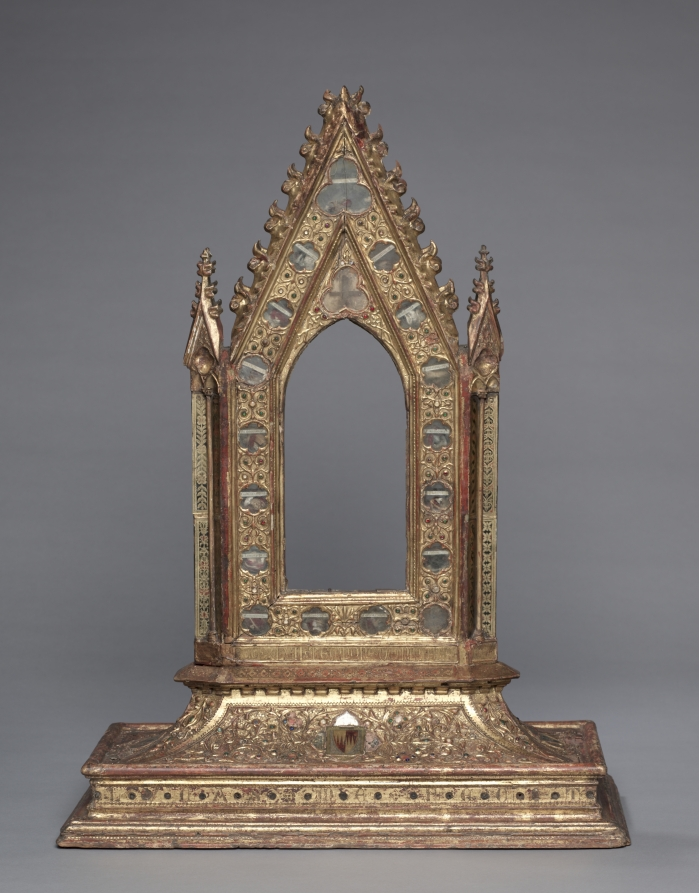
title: Frame for a Portable Reliquary Icon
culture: Italy, Siena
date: 1347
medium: gilded wood, modeled gesso, verre églomisé, glass cabochons, and relics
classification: Glass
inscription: an inscription with a stipled background runs around the lowest edge of the upright part of the frame: obverse: HOC/OPUS : FACTUM . FUIT . SUB . ANNO . DO/MINI; reverse: [small loss] /CCC . XLVII . TEMPORE . DOMINI . MINI/CINI. [This/work : has . been . made . under . year . of . the . Lord [small loss] /300 47 . in . the . time . of the Lord . Mini/Cini.] Another inscription appears on the obverse and reverse of the base: LUCAS ME FECIT. [Luke has made me.]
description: In the Middle Ages relics were thought to possess extraordinary power and were enshrined in lavish vessels called reliquaries. This complex frame once contained a painted image on each side, believed to be the Madonna and the Crucifixion, both long since lost. These images were surrounded by 17 carefully labeled relics, still visible. Intentionally portable, such votive objects could be easily carried from room to room or building to building as needed. A Latin inscription around the base reads: This work has been made under the year of the Lord CCCXLVII [1347] in the time of the Lord Mini/Cini. The inscription likely refers to Mino Cinughi, rector of the Hospital of Santa Maria della Scala in Siena, 1340-51. The Cinughi coat of arms as well as those of the hospital appear on the base. Another inscription, LUCAS ME FECIT (Luke made me), appears on both sides of the base. While this object probably resided on an altar in the hospital, the fact that it has two sides suggests it was carried aloft in processions.